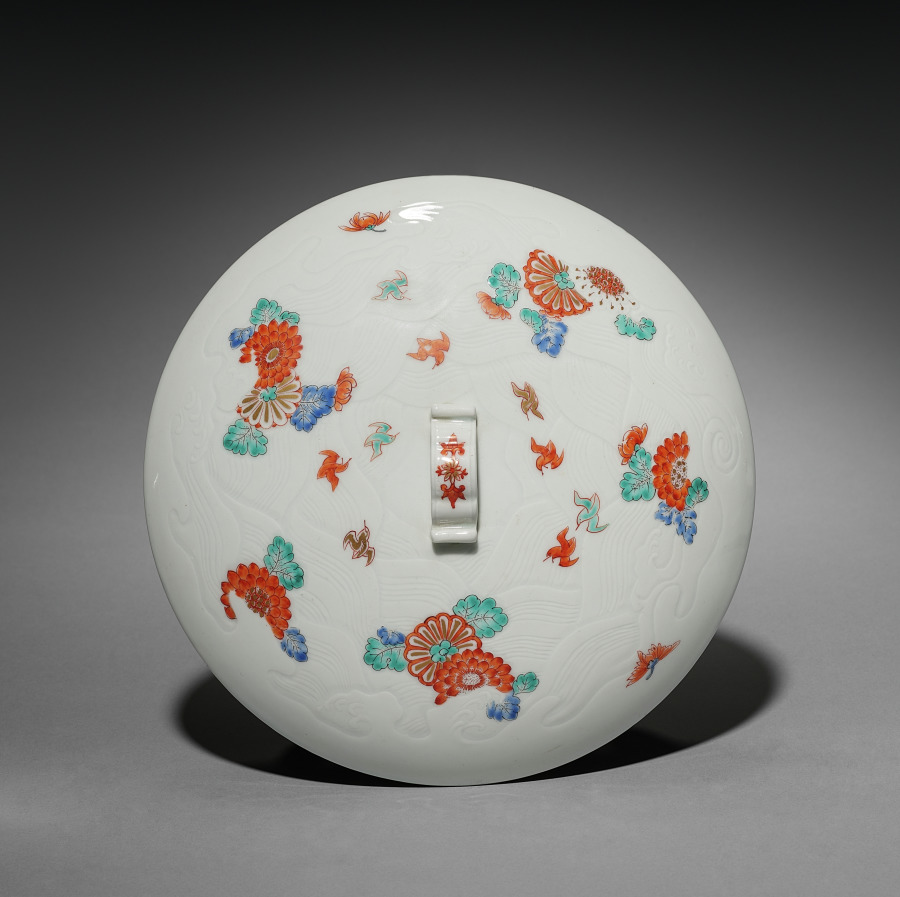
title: Covered Bowl with Chrysanthemums and Chidori: Kakiemon Ware (cover)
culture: Japan, Edo period (1615–1868)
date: early 1700s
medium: porcelain with decoration in colored enamels; molded design of waves on exterior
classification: Ceramic